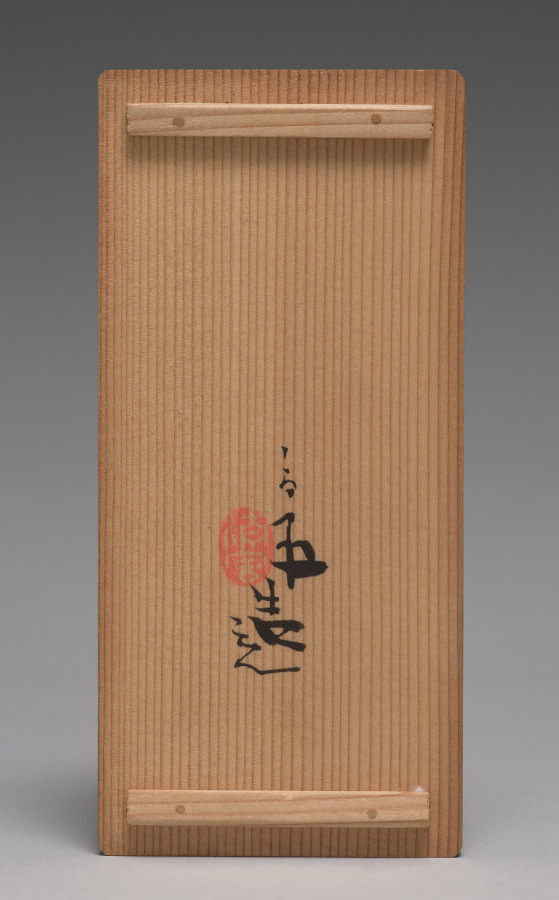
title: Water Cooler with Chinese Gardens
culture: Japan, Meiji period (1868–1912)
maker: Seifū Yohei III (Japanese, 1851–1914)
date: 1893–97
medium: Porcelain with molded and carved designs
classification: Ceramic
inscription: Artist's seal beneath the handle.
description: Unlike most pieces by the Seifu Yohei studio, this one bears a seal beneath the handle rather than on the base. The glaze and technique are identified on the box as taihakuji, or “great white porcelain,” an important early invention Yohei III devised in 1872 that involved the combination of a distinctive translucent, creamy glaze over an ivory-colored clay body. The body’s two sides have garden scenes seen through windows. Designs of flowers and butterflies are incised in the spaces at both ends. The garden on the right-hand side of the vessel, seen through a round window, has a decorative rock with grasses beneath a cloudy sky; and on a tiled veranda, there is a teapot as well as a fan and two scrolls inserted into a double-handled urn or kettle atop a brazier. The garden on the left-hand side has two enormous flowers below what may be either a cloud or a rippling pond; a garden rock—or perhaps a carved wood sculpture—with a circular perforation sits on what appears to be a veranda. While the details may be open to interpretation, the setting is a rather glamorous Chinese residence or palace with a superbly tended garden in spring or summer.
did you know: This water cooler has a handle with a dragon head.